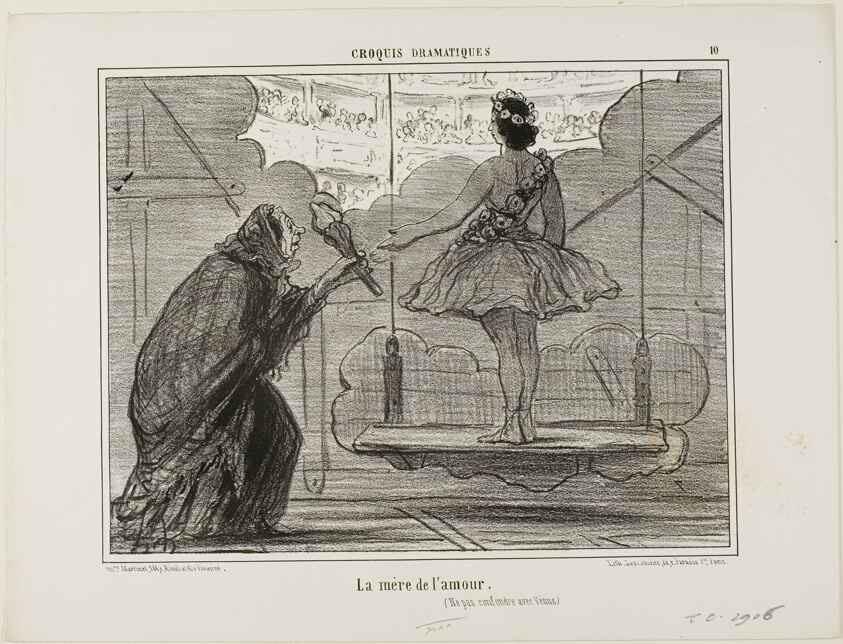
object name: Print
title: The mother of Eros (not to be confounded with Venus), plate 10 from Croquis Dramatiques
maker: Honoré Victorin Daumier; French, 1808-1879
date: 1857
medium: Lithograph in black on white wove paper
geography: France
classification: lithograph; print; prints and drawing